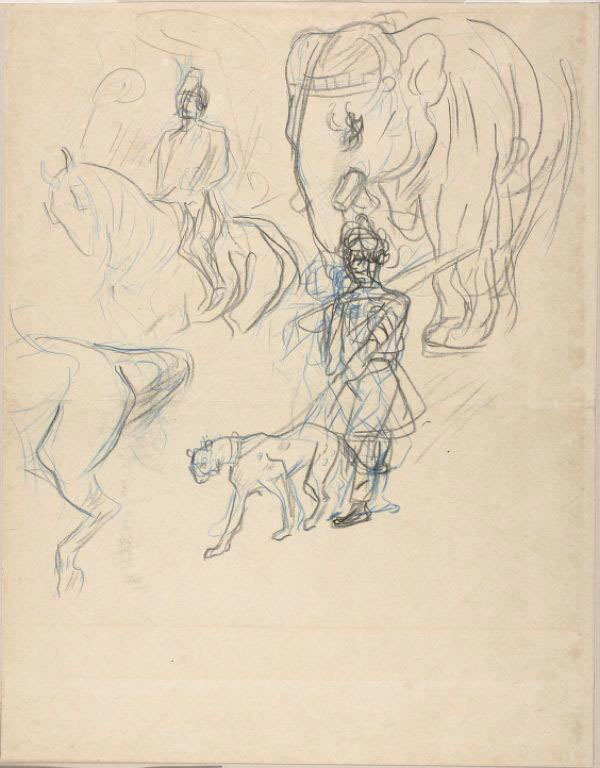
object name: Drawing and Watercolor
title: The Cortege of the Rajah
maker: Henri de Toulouse-Lautrec (French, 1864-1901)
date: c. 1895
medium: Black and blue crayon on tan wove paper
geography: France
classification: crayon; drawings (visual works); prints and drawing